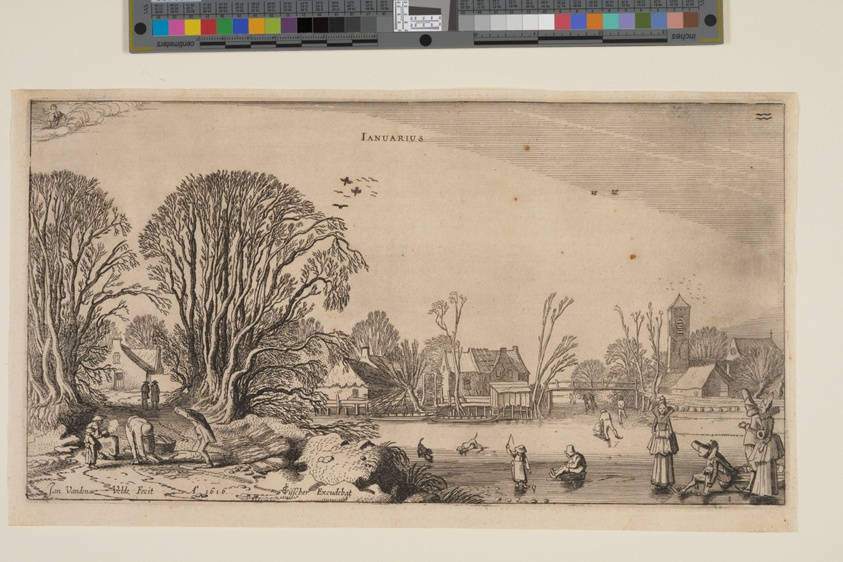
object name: Print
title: January, from The Twelve Months of the Year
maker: Jan van de Velde II (Dutch, c. 1593–1641); after Willem Buytewech (Dutch, c. 1591–1624)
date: 1616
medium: Etching on ivory laid paper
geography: Netherlands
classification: etching; paper; print; prints and drawing